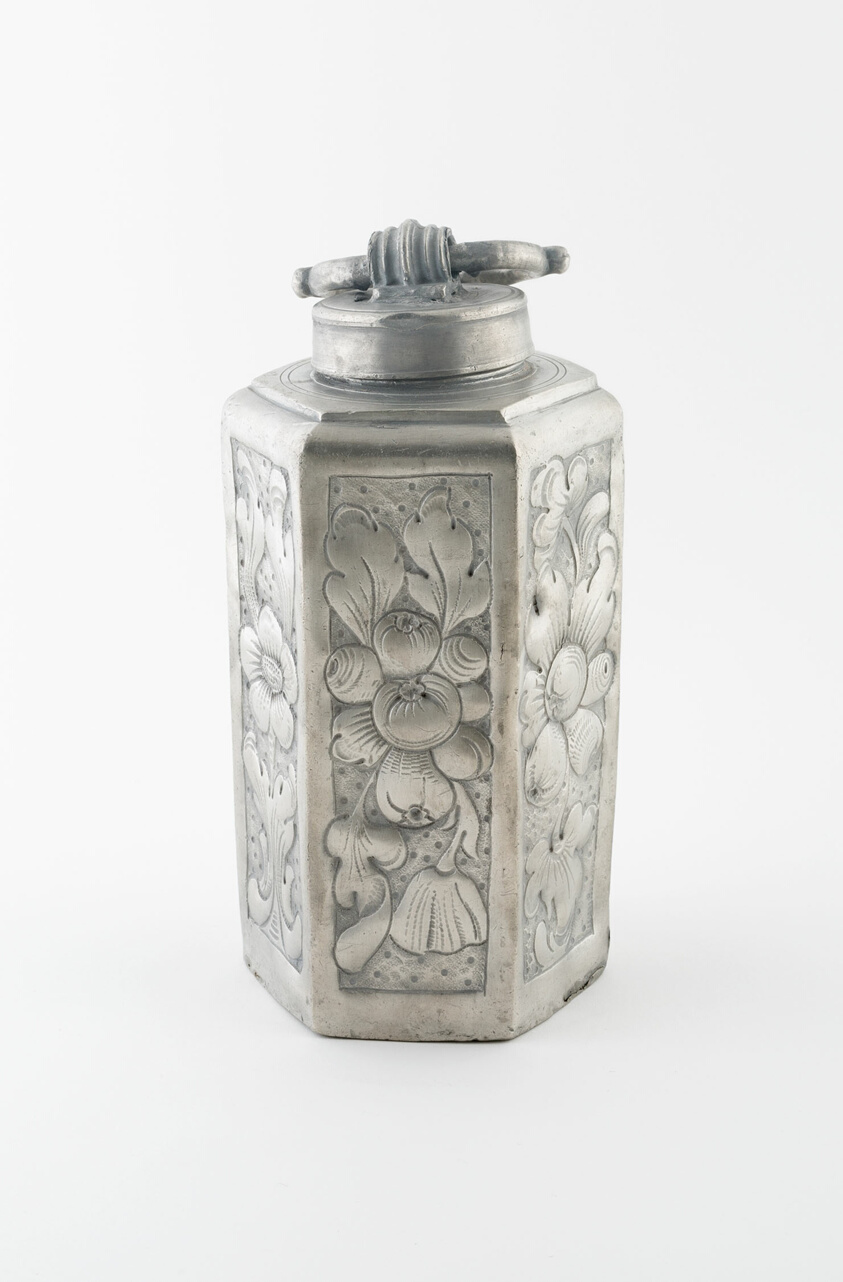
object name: Metalwork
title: Wine Can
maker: C.F.S.; Nuremberg, Germany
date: 18th century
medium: Pewter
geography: Nuremberg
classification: pewter; metalwork; european decorative arts